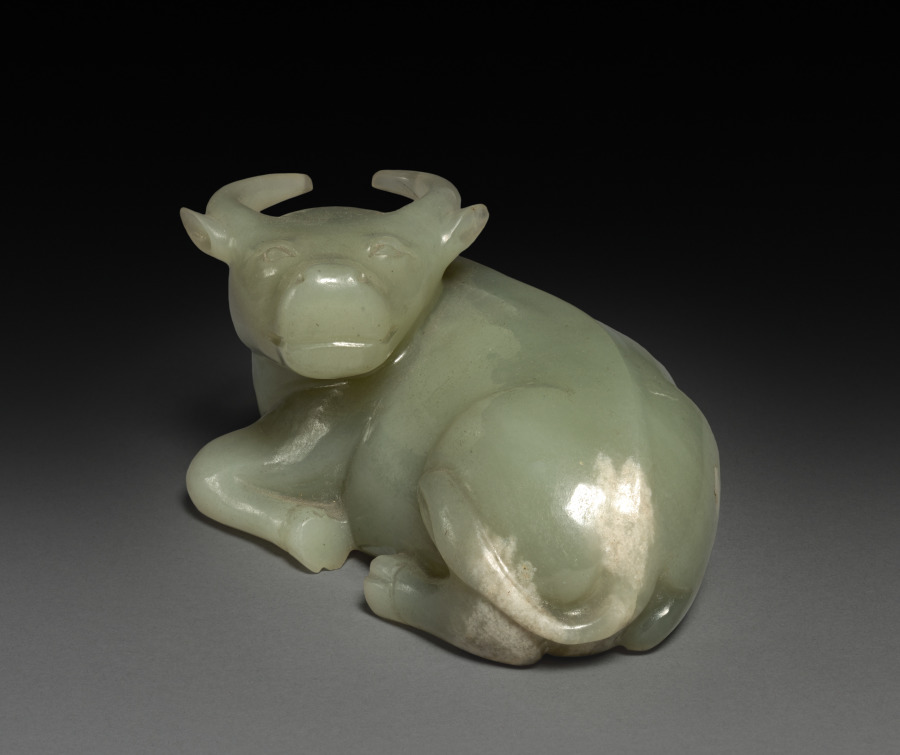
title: Reclining Water Buffalo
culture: China, Qing Dynasty (1644-1911), Kangxi reign (1642-1722)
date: 1642–1722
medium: Jade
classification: Jade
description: In the Ming (1368–1644) and Qing (1644–1911) dynasties, luxury items became more affordable to larger parts of the society, including women, merchants, and literati in non-official positions. Imperial patronage and a growing urban population encouraged consumption of luxury goods and local craftmanship. This jade buffalo illustrates the superb carving skills and the creative mind of its accomplished creator, who sought clients on a competitive market.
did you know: This jade buffalo may have been used as a paperweight on a scholar's desk.